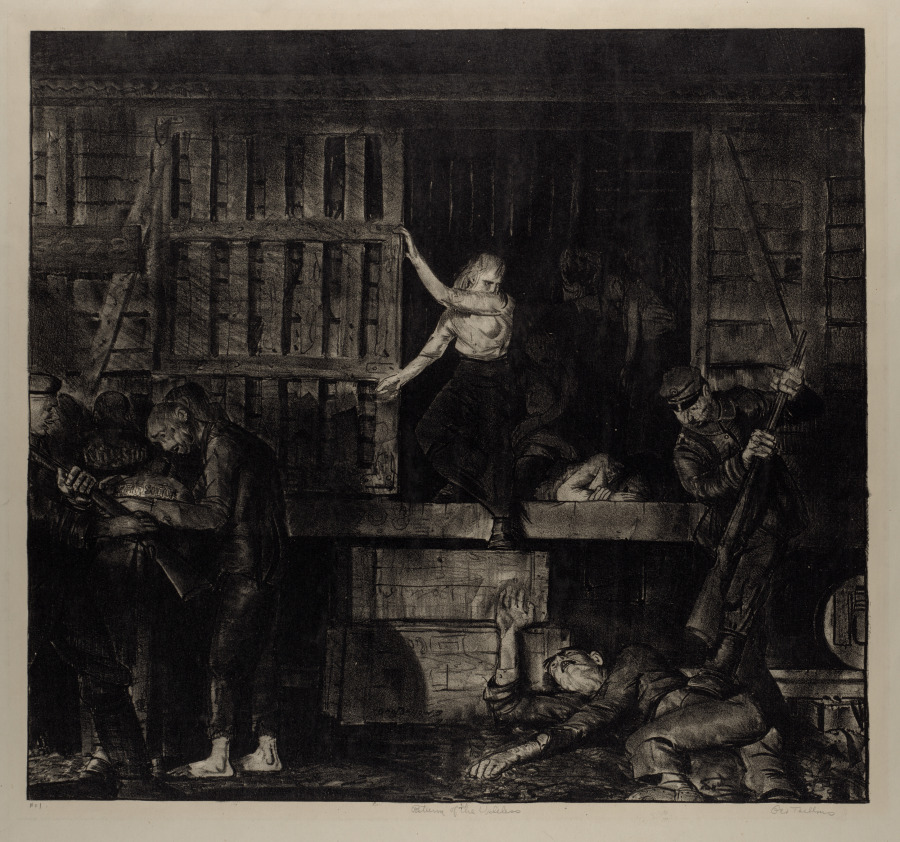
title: War Series: The Return of the Useless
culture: America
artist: George Bellows (American, 1882–1925)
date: 1918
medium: lithograph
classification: Print